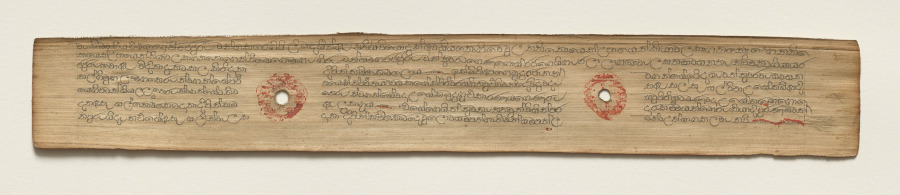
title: Leaf from a Buddhist Manuscript (verso)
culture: Sri Lanka, Singhalese, Late 17th century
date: c. 1700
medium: fiber paper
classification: Manuscript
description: Palm leaf material is still used for manuscripts in Sri Lanka. The palm leaves are prepared first by boiling them, drying them in the sun, and then rubbing them with oils. Scribes then use a metal stylus to incise the text. Then charcoal powder is wiped across the pages, filling in only the inscribed lines.